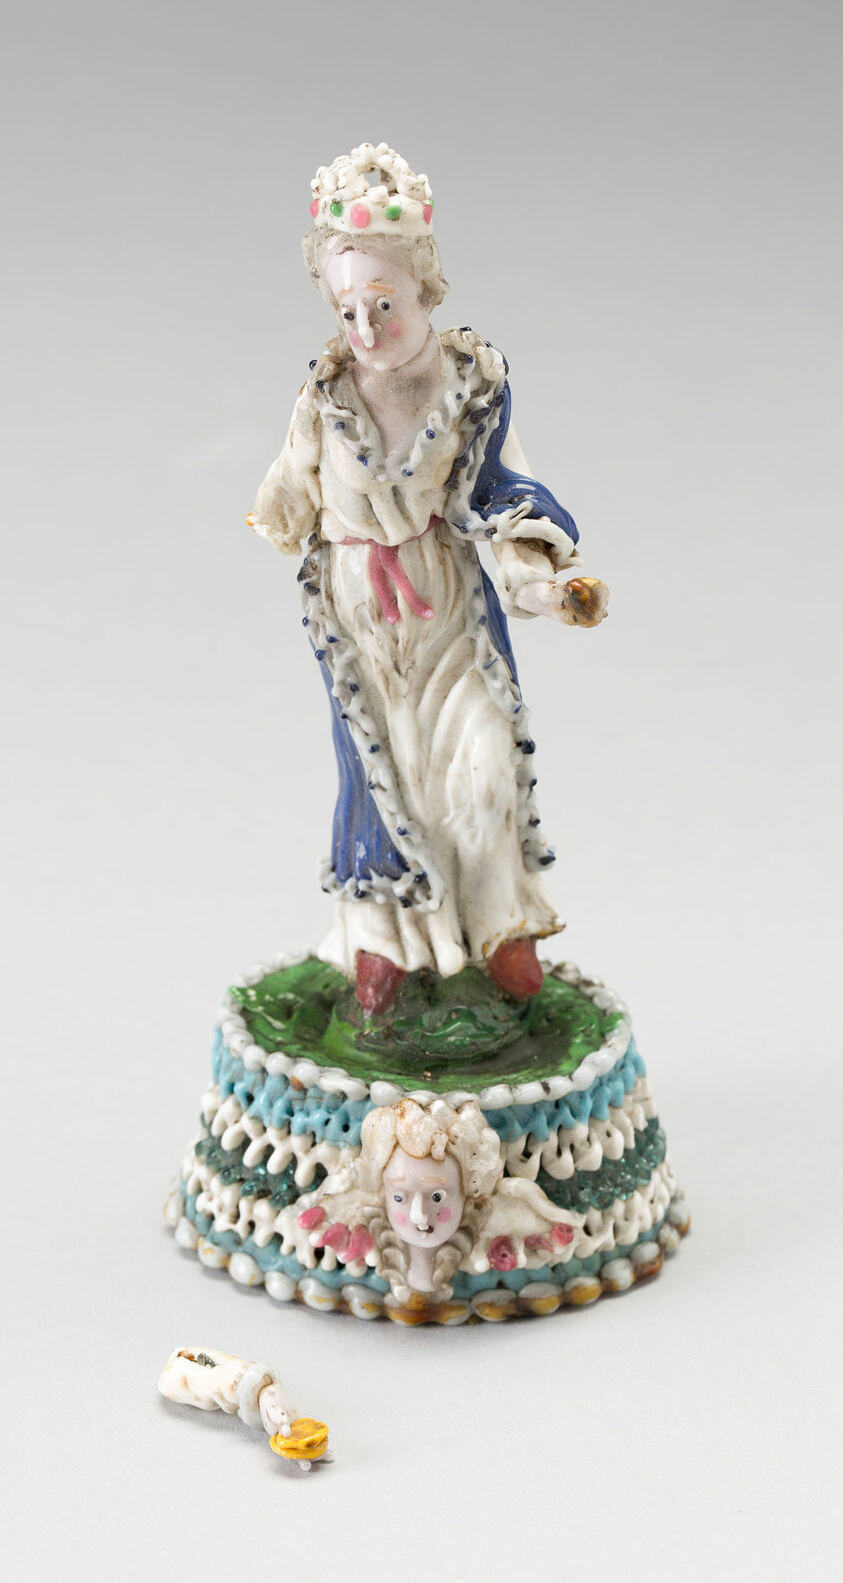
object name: Glass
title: Queen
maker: Nevers, France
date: 1700/50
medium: Glass; lampwork (verre de Nevers), metal armature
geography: France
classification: decorative object/ornament; lampwork; glass; european decorative arts